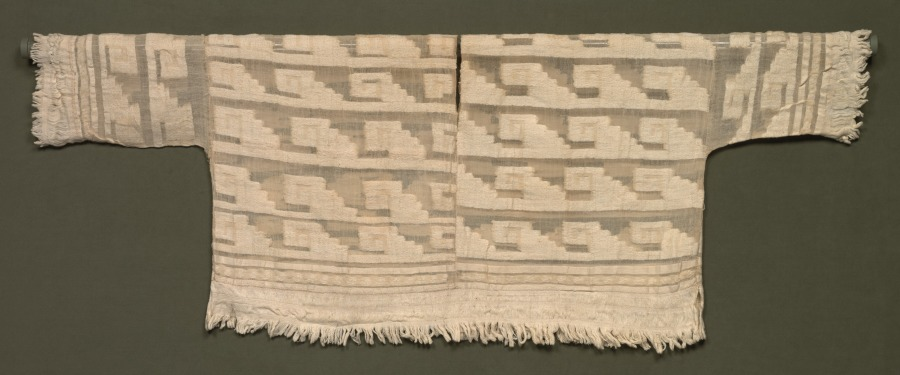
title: Tunic and Band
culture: Peru, Chimú or Chimú-Inka, 12th-16th century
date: 1100–1532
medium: white cotton; plain weave with supplementary weft brocading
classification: Textile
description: Although these garments are similar in appearance and technical features, it is not clear that they were found or used together. To see the record for each, click “see all set records,” above.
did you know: The Chimú forged an empire that thrived until the 1460s, when the Inka incorporated it into their own imperial domain.